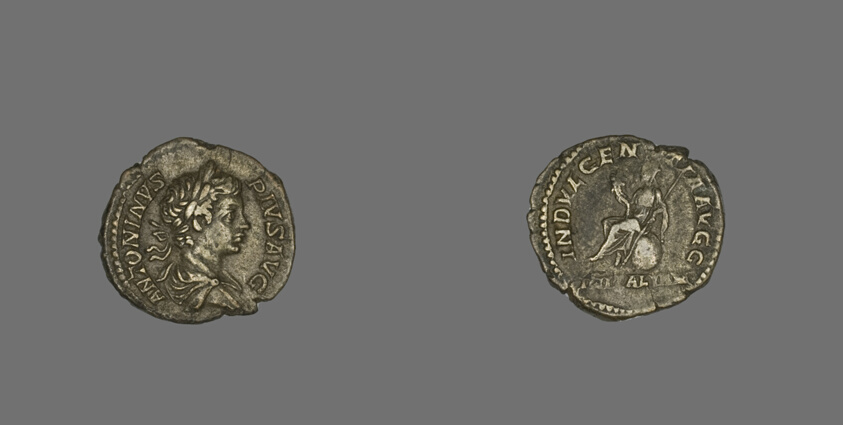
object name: Coin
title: Denarius (Coin) Portraying Emperor Caracalla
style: roman (ancient, style or period), ancient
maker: Roman, minted in Rome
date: 201-206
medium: Silver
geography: Roman Empire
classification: coin; ancient art; struck